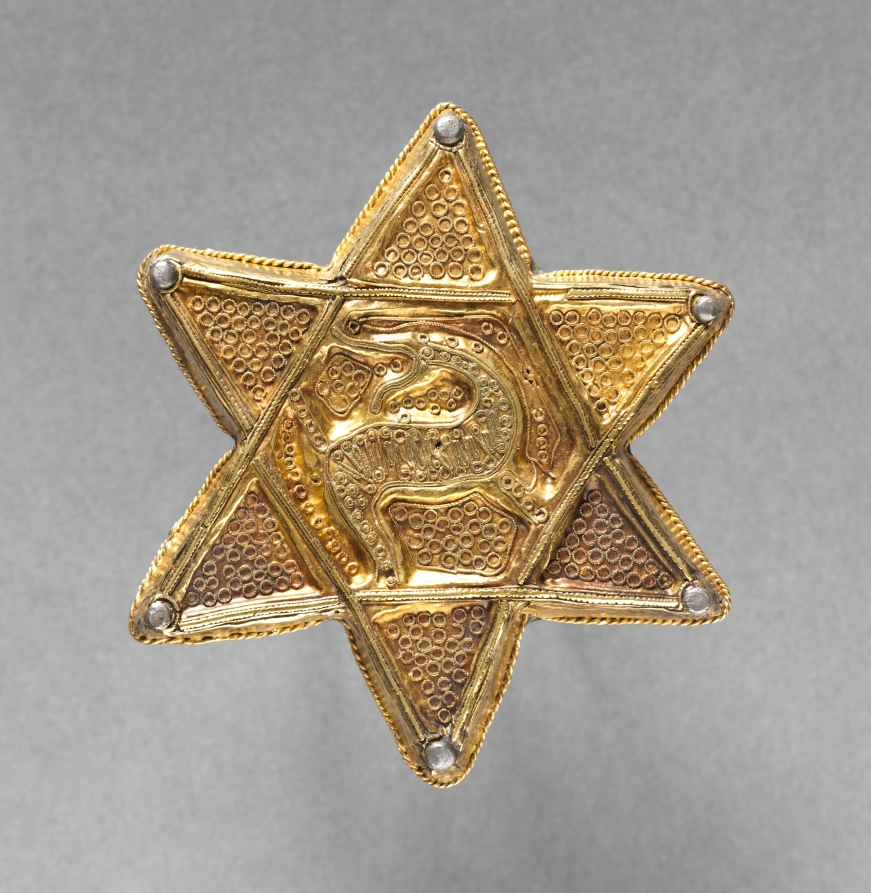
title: Brooch in the Form of a Six-Pointed Star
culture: Frankish, early Carolingian, late 8th century - early 9th century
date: late 700s-early 800s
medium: gold with repoussé and filigree decoration; copper backplate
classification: Metalwork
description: Women used brooches like this to fasten their veils beneath the chin. Its rare form--a hexagram--suggests that it also functioned as a talisman or amulet to attract good luck and to ward off evil.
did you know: Look carefully at this brooch and notice a small animal, perhaps a dragon, camouflaged amid the swirling whirls of gold.